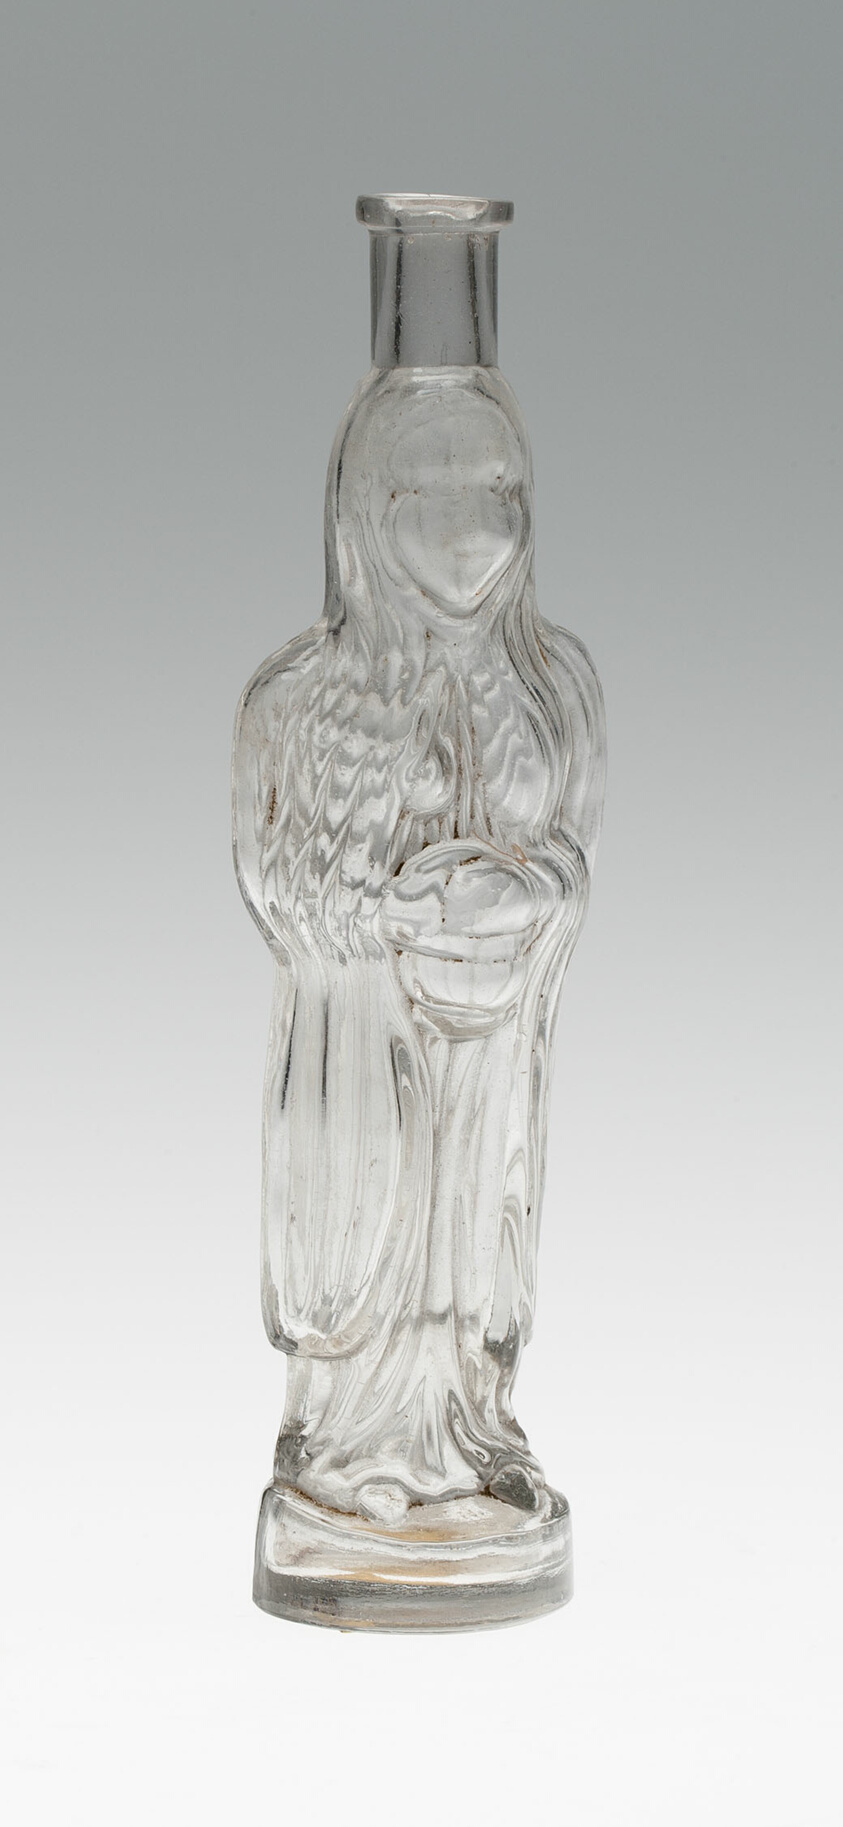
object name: Glass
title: Bottle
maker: Bohemia, Czech Republic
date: c. 1840/50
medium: Glass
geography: Bohemia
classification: glass; european decorative arts